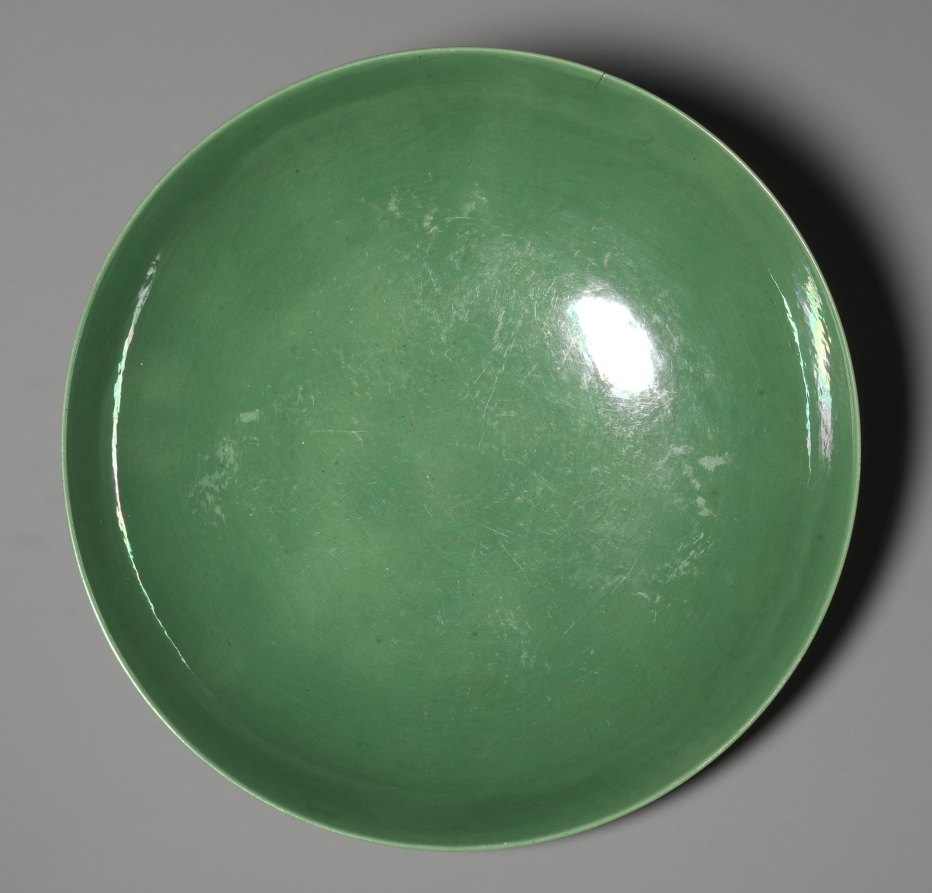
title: Dish with Green Glaze and Carved Floral Designs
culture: China, Qing dynasty (1644-1911), Qianlong mark and reign (1735-1795)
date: 1736–95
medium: glazed porcelain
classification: Ceramic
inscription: 大清乾隆年制